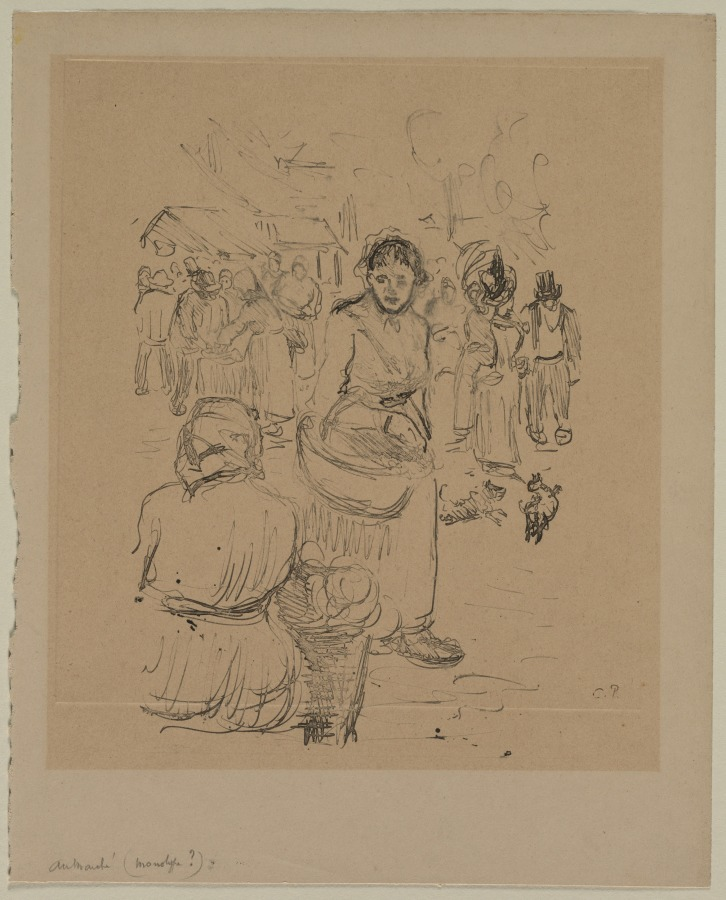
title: At the Market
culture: France, 19th century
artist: Camille Pissarro (French, 1830–1903)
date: late 1800s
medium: monotype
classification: Print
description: Pissarro probably learned the technique of monotype from his friend Edgar Degas. Although it allowed him to work in a spontaneous and expressive way, the medium never played a significant role in his work.